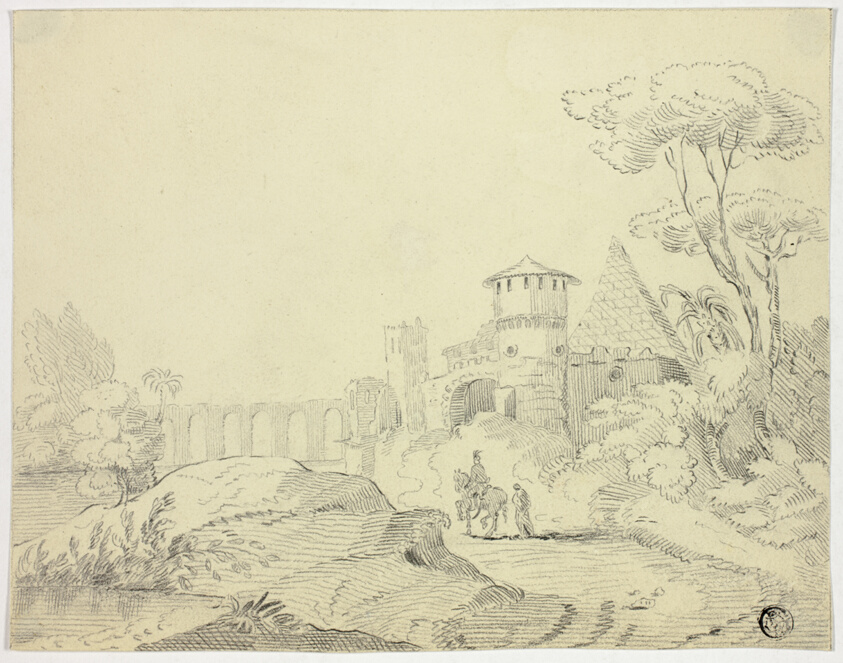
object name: Drawing and Watercolor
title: Outside of Porta Metella, Rome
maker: Unknown Artist; French, 18th century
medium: Graphite on cream wove paper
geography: France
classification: graphite; drawings (visual works); prints and drawing